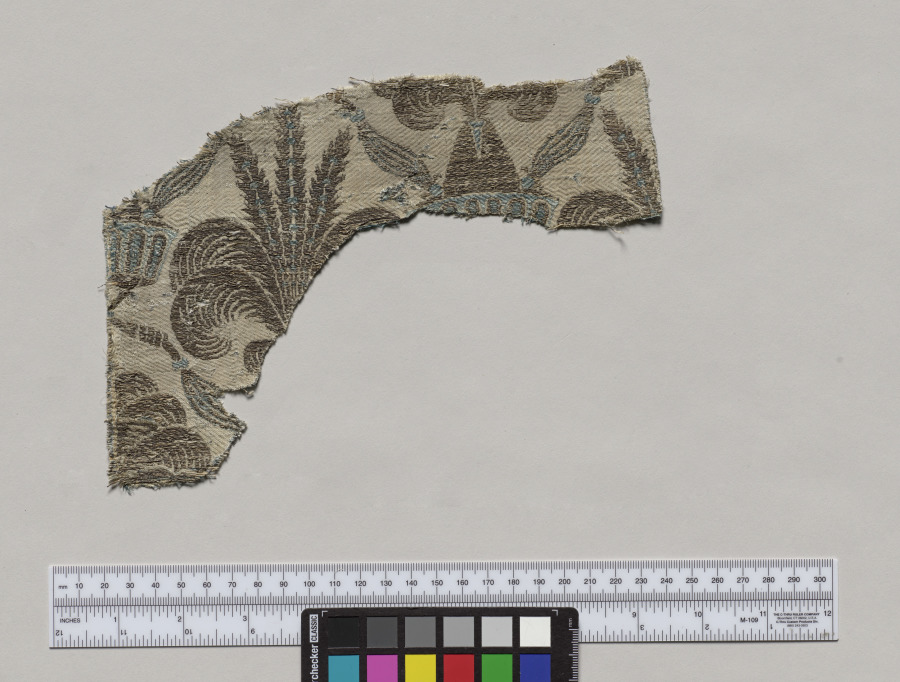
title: Silk Fragment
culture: Italy, last third of the 14th century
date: 1360–1399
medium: lampas weave, silk and gold thread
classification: Textile